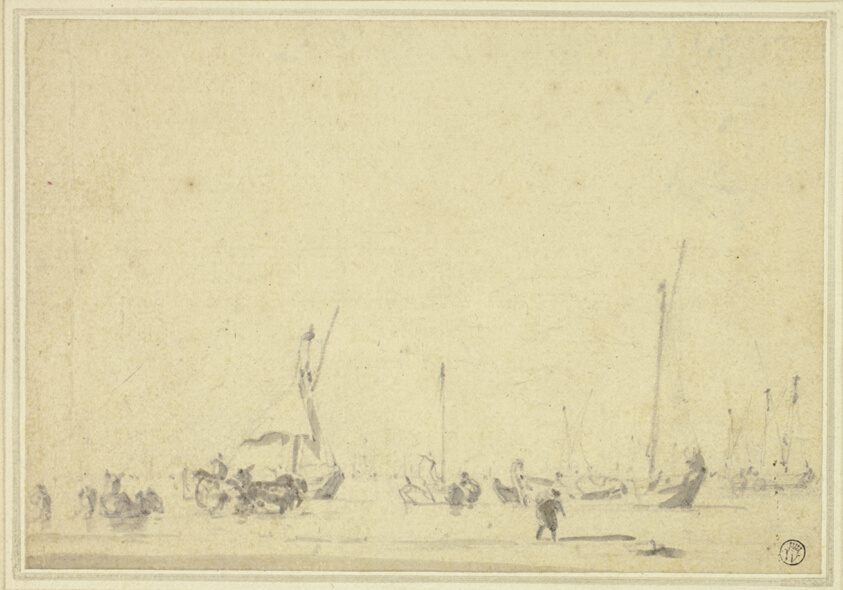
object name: Drawing and Watercolor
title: Boats at Anchor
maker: Attributed to Willem van de Velde, II; Dutch, 1633-1707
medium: Graphite with brush and gray wash, on tan laid paper, laid down on board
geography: Holland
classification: ink or chalk wash; drawings (visual works); prints and drawing